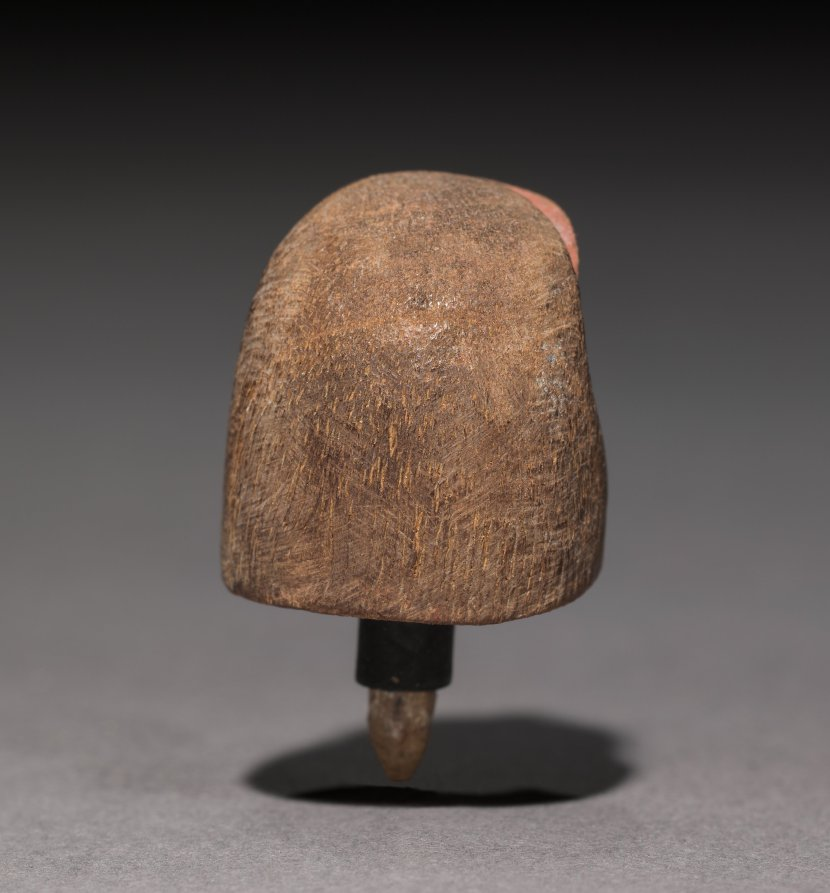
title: Falcon Head Steering Oar Butt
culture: Egypt, Middle Kingdom (2040–1648 BCE)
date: 2040–1648 BCE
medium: wood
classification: Funerary Equipment